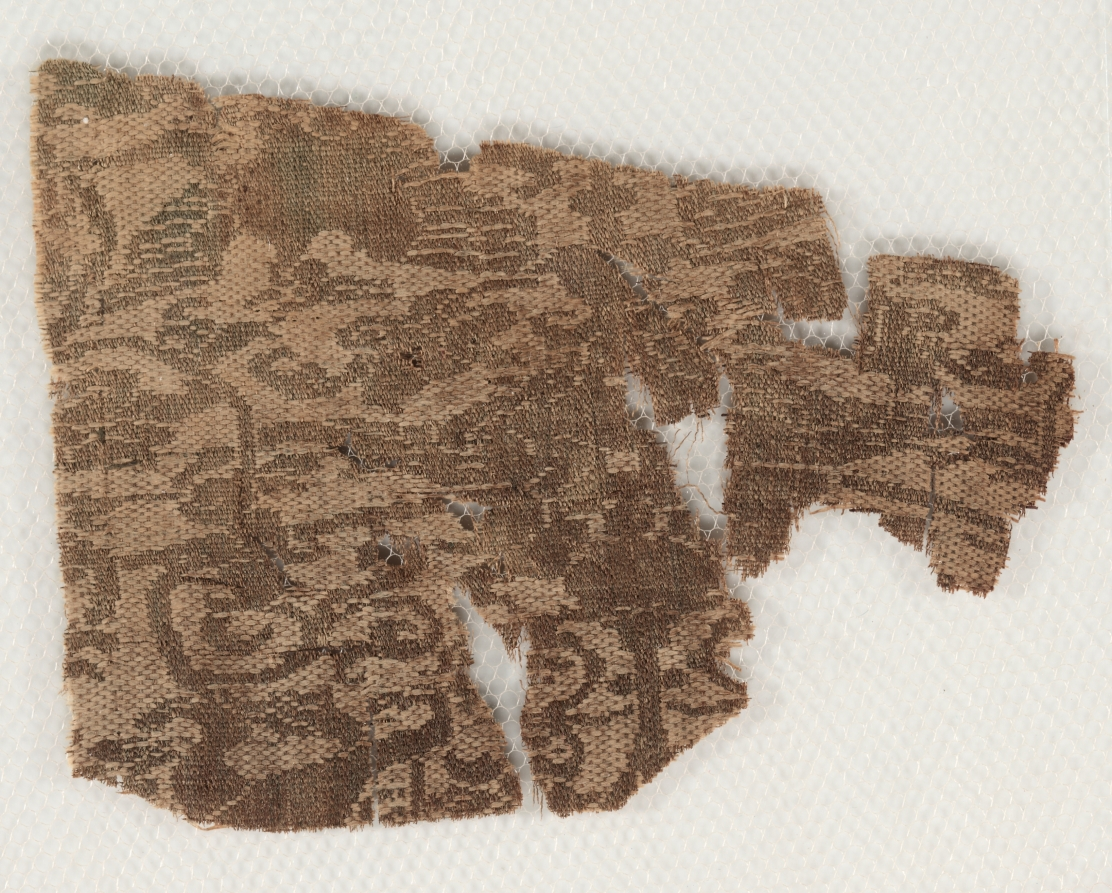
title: Fragment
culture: Egypt, Ayyubid, 12th century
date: 1100s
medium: tabby with supplementary weft; silk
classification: Textile